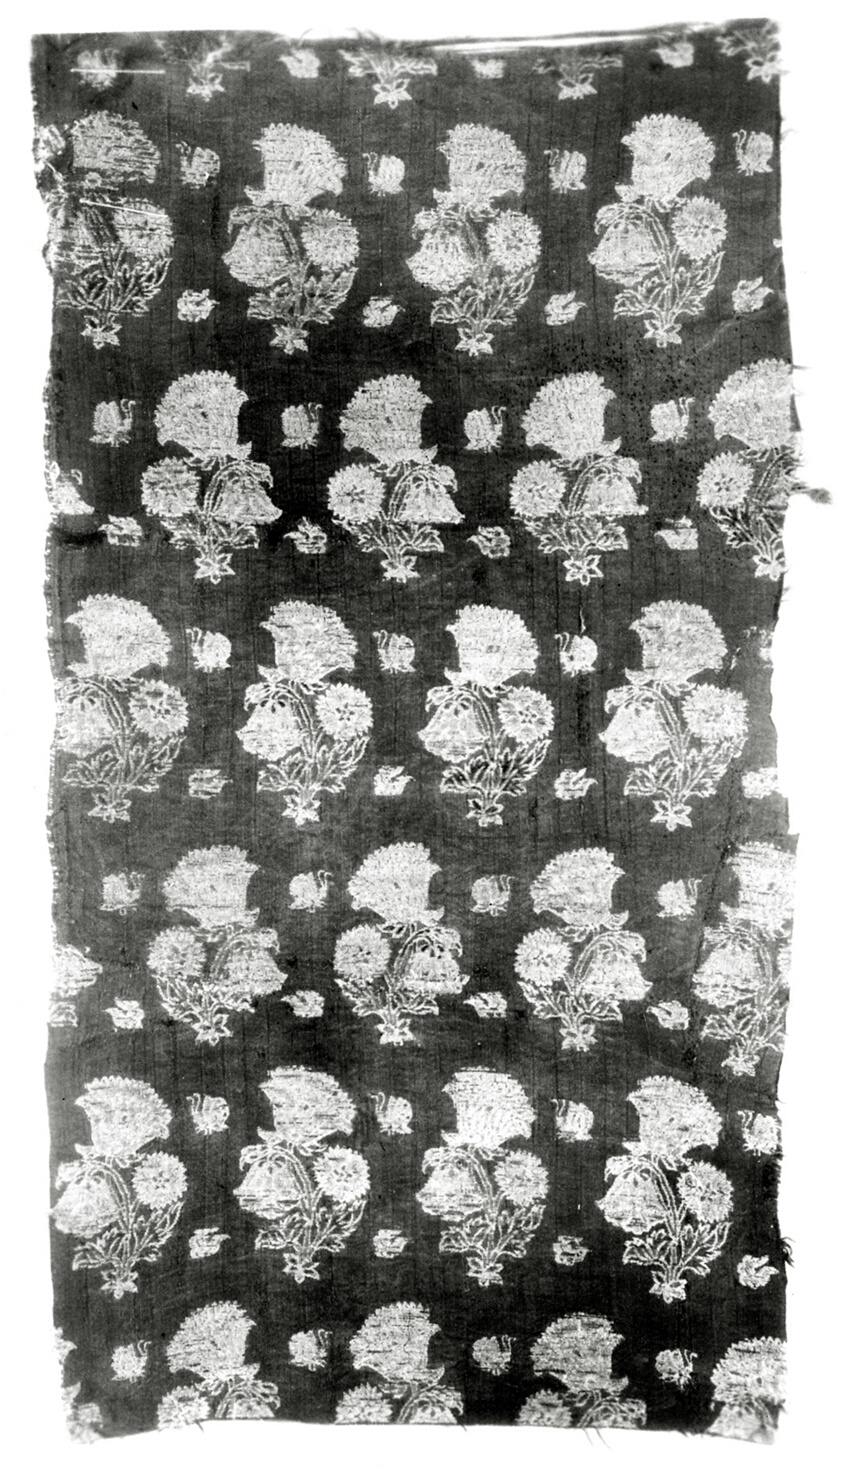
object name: Textile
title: Fragment (Dress Fabric)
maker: Iran (Yazd)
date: 18th century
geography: Iran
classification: textile; weaving